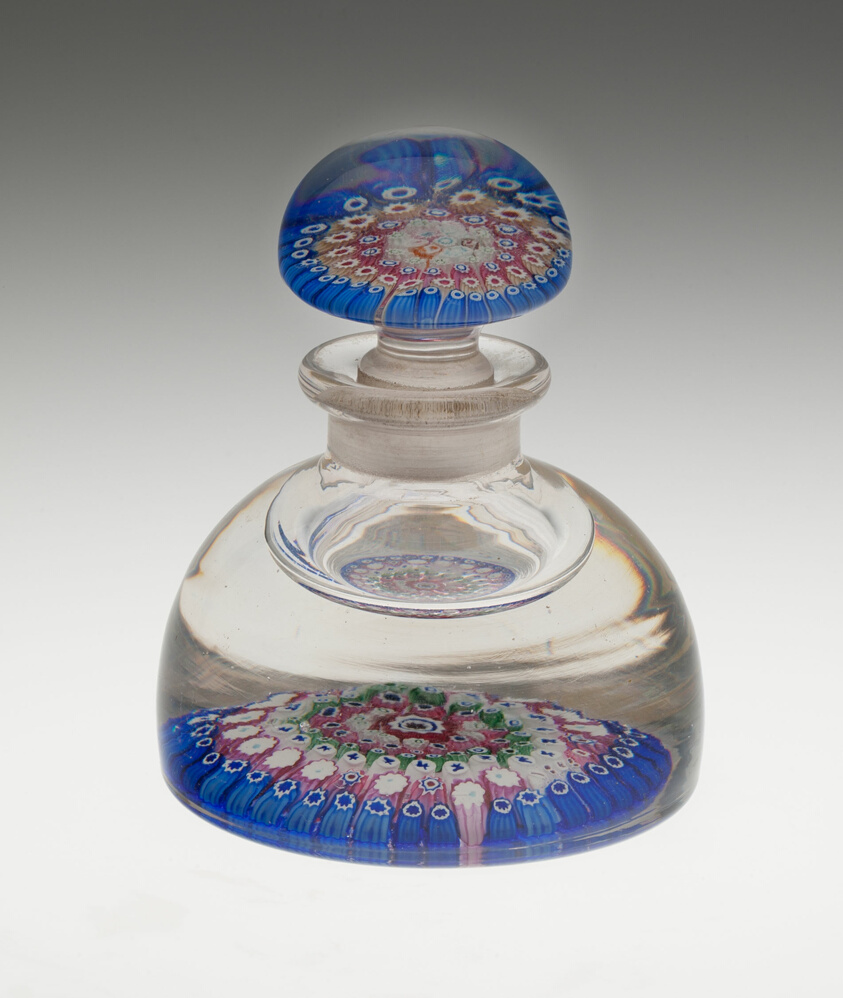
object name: Glass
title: Inkwell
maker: Whitefriars Glasshouse (English, founded late 17th century)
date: 1848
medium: Glass; blown with millefiori canes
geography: London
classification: glass; european decorative arts